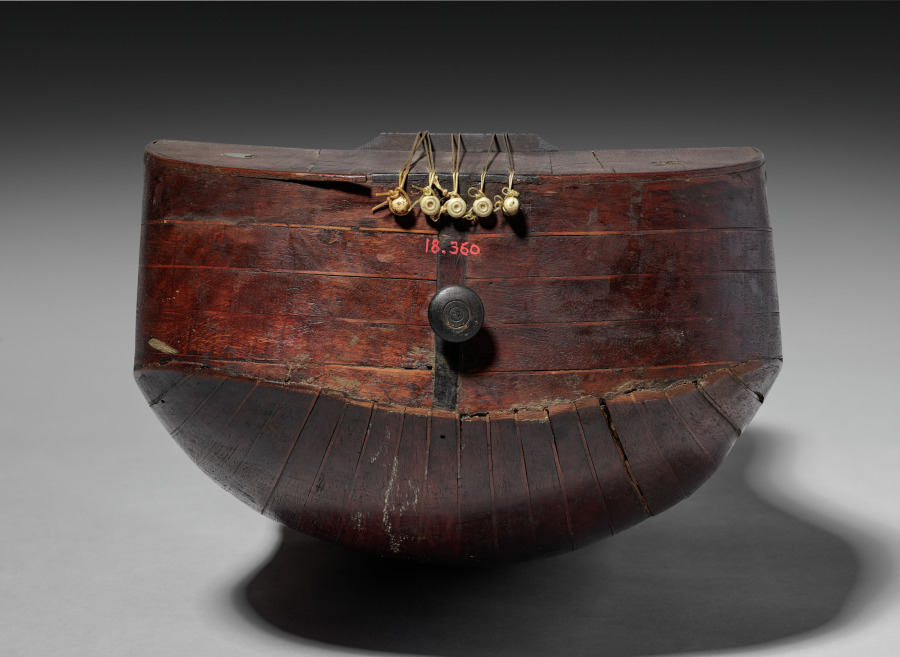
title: Chittara Battente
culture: Italy, 15th century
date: 1400s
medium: wood, paper?, sound hole, bone bridge, sheet metal inlay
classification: Musical Instrument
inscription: bears broken ticket of parchment.